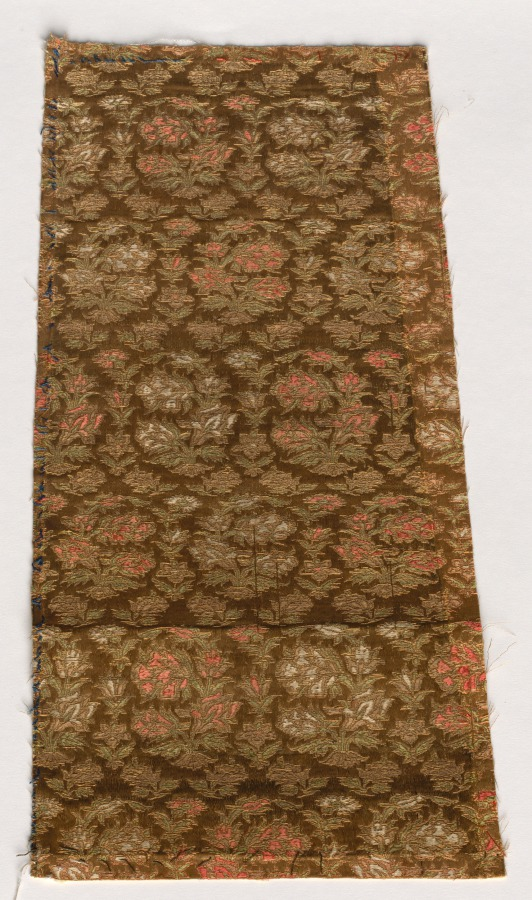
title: Textile Fragment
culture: Japan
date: 1800s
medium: silk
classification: Textile